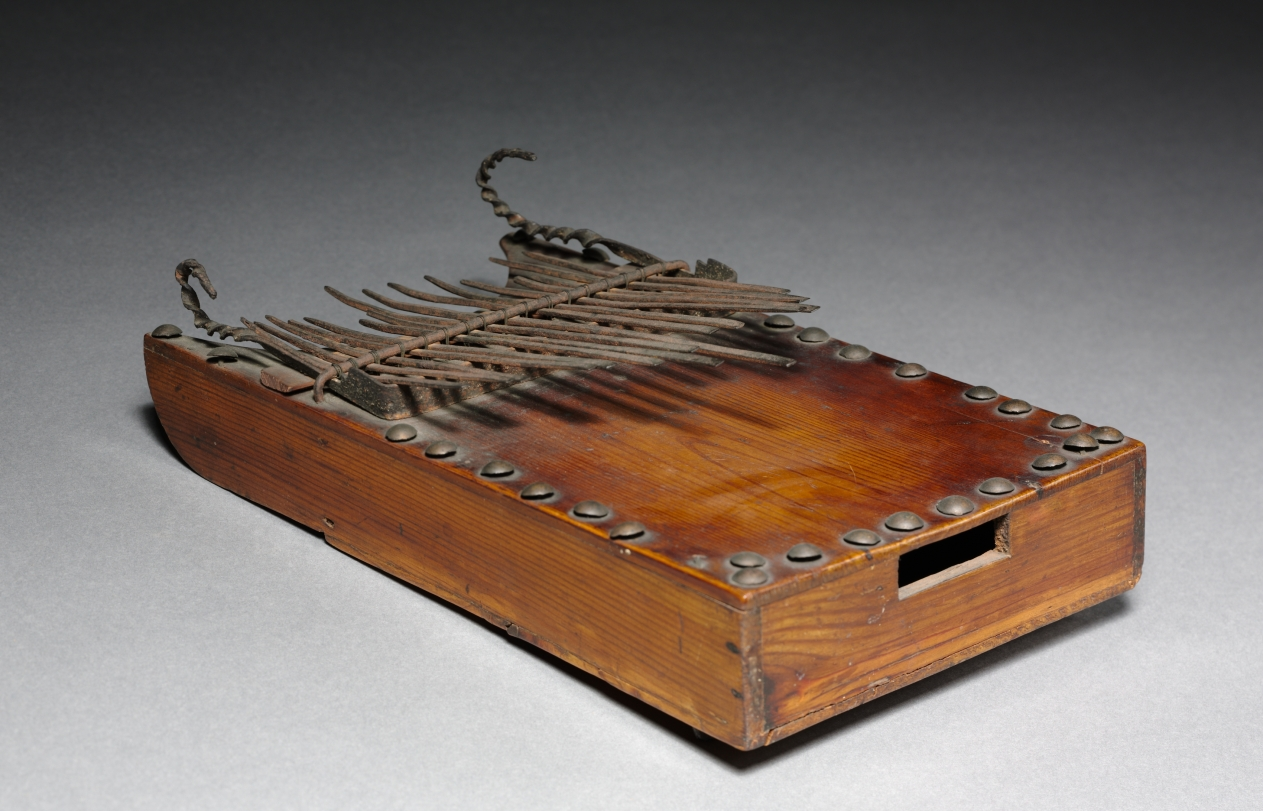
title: Lamellophone "thumb piano"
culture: Africa, Central Africa, Democratic Republic of Congo, Bushoong-style maker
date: 1900s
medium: Wood, iron, and upholstery studs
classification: Musical Instrument